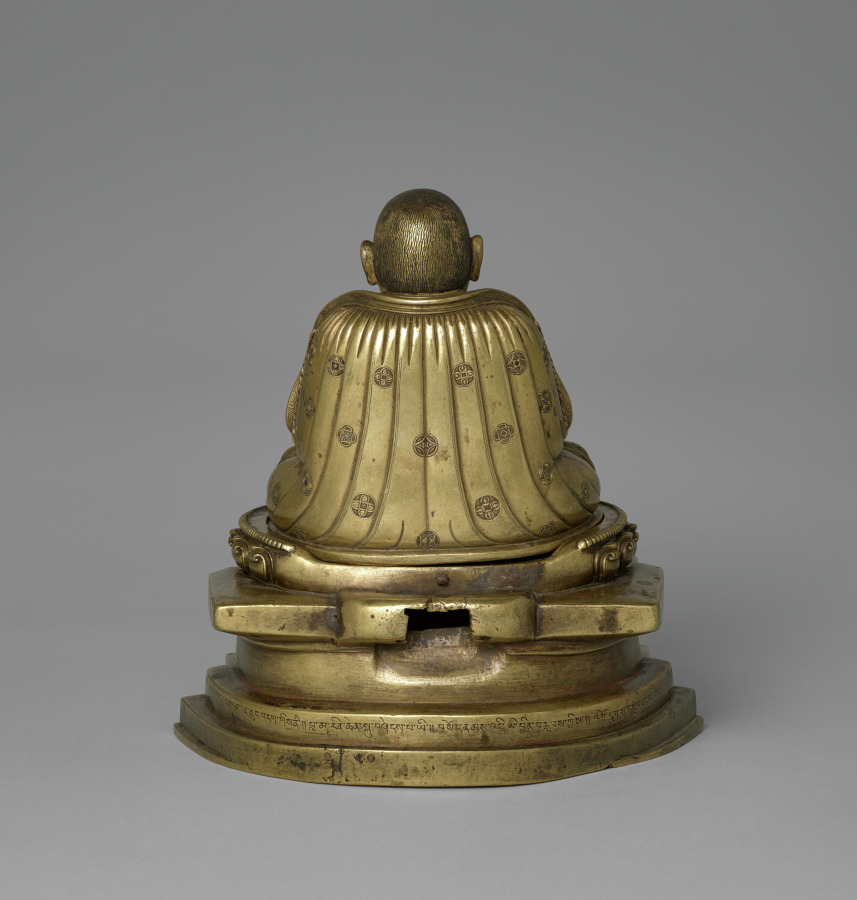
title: Portrait of Phagmo Drupa Dorje Gyalpo (1110–1170)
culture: Central Tibet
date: 1200s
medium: gilt bronze with gold, silver, copper, turquoise, lapis, and coral inlay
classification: Sculpture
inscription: / / Na mo 'ghu ru / / Ngan lam ban chung bdag gis ni / / bla ma Rin chen sku bzhengs pa yi / / bsod nams 'di yi byin brlabs kyis / / 'gro drug sdug sngal zad par shog / / Translation: "Salutations to the master ! May the sufferings of the six kinds of beings be appeased through the blessing of merit gained by me, the little monk of Ngan.lam, in having this statue of the Lama Rin.chen made."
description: This portrait statue depicts the first monastic leader of the prominent Buddhist monastery of Densatil, an influential early leader of the Tibetan Buddhist monastic order called Kagyu, famous for his views on the importance of meditation. He sits on a lotus pedestal and lion throne, like a Buddha, and his hand positions (mudras) communicate that meditation leads to enlightenment.